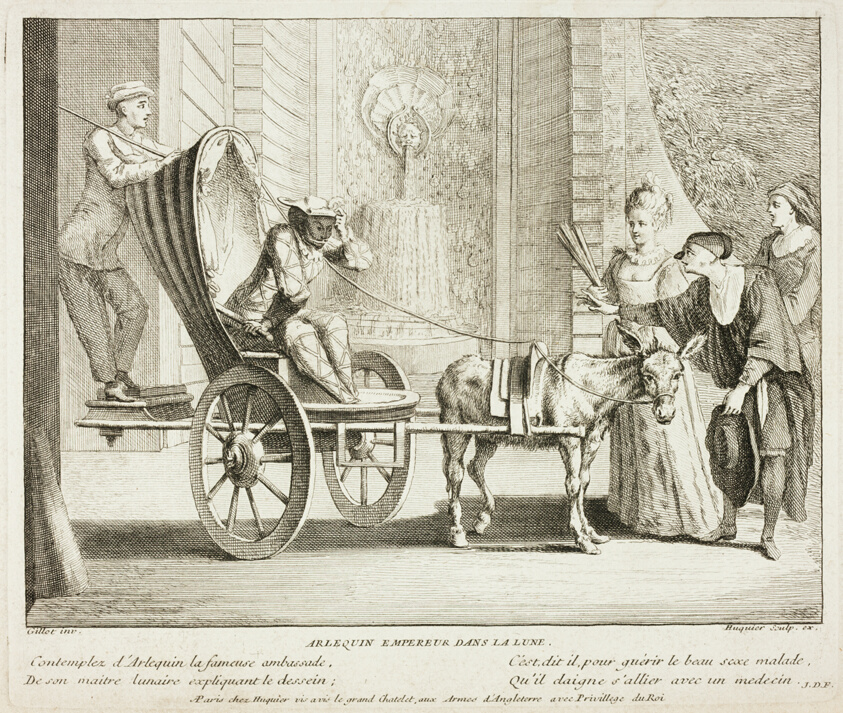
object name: Print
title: Plate from Livre de Scènes Comiques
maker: Gabriel Huquier (French, 1695-1772); after Claude Gillot (French, 1673-1722)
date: 1729/32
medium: Etching on paper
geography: France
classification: etching; print; prints and drawing